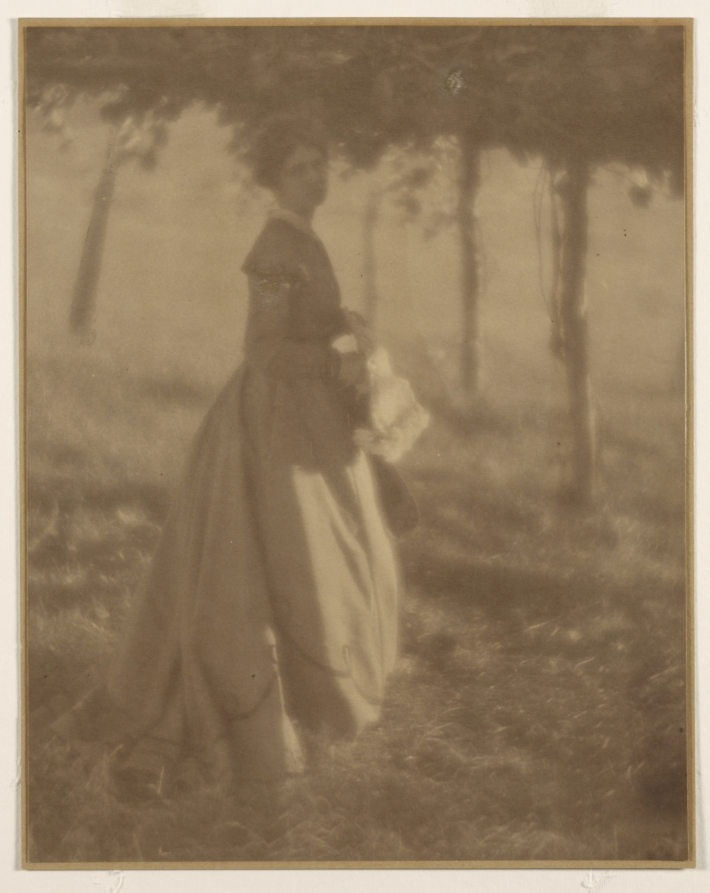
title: In the Arbor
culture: America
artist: Clarence H. White (American, 1871–1925)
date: 1906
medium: platinum print with graphite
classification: Photograph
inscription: Written in pencil on recto of original mount: "Clarence H. White [signed] '6"